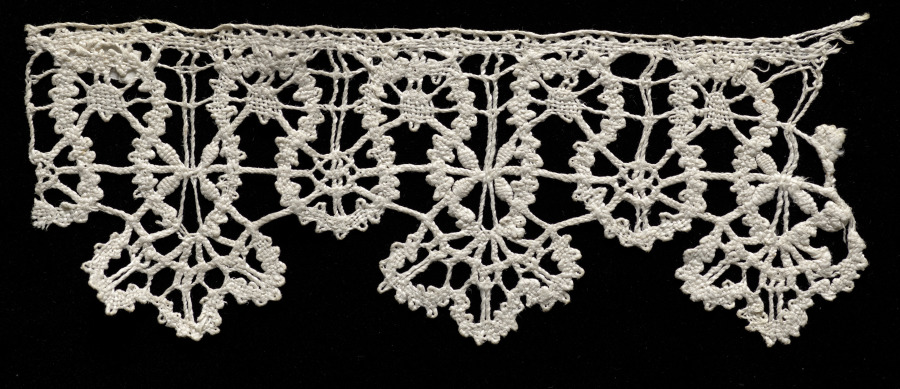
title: Lace Edging with Bell Points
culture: Italy, Genoa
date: 1600s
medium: Bobbin lace (rose lace)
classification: Lace